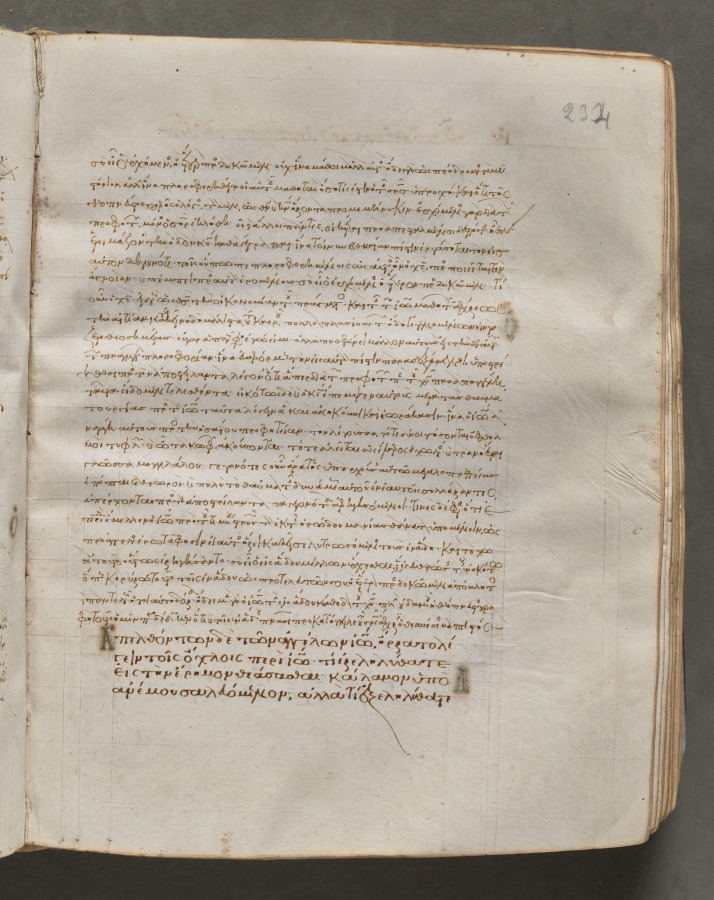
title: Text, folio 234 (recto), from a Gospel Book with Commentaries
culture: Byzantium, Constantinople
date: c. 1000–1100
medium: ink, tempera, and gold on vellum; leather binding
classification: Bound Volume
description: Each of the four gospels in this book opens on a page with brilliantly illuminated borders depicting the author of the text as well as birds—principally peacocks, symbols of the immortality of the soul—and fountains, representing the fountain of life and the salvation of the soul. This volume consists of 428 leaves with texts in Greek. Its level of sophistication suggests that it was probably written and decorated in a monastery in Constantinople.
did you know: Gospel books were carried in procession through Byzantine churches.